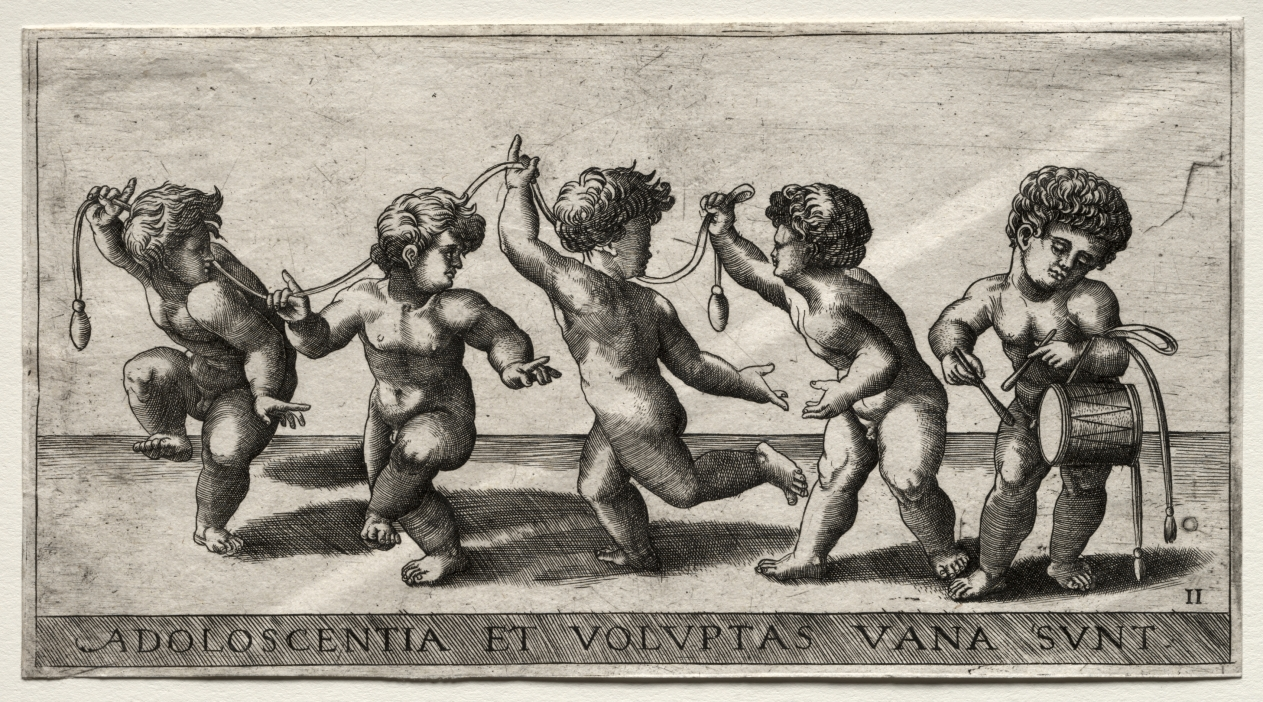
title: Children Dancing to a Drum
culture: Italy, worked in France, 16th century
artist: Giorgio Reverdino (Italian, active c. 1531–1564/70)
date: mid-16th century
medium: engraving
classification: Print